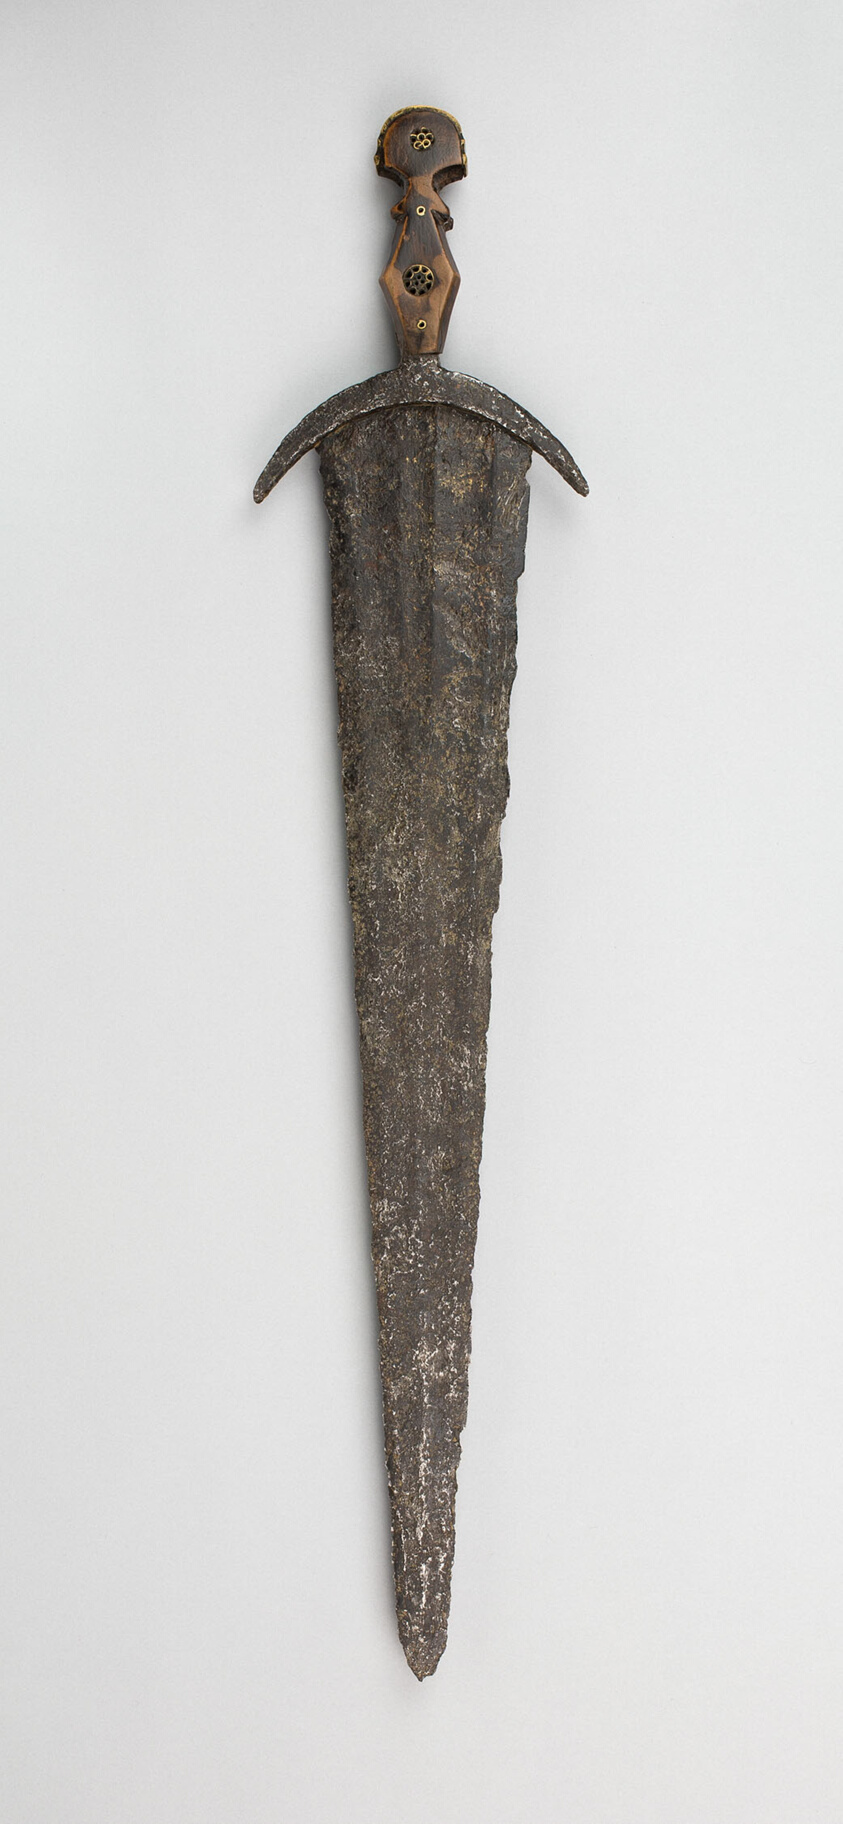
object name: Arms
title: Cinquedea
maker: Italian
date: About 1500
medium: Steel, bone, and bronze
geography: Italy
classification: edged weapon-dagger; arms; arms and armor